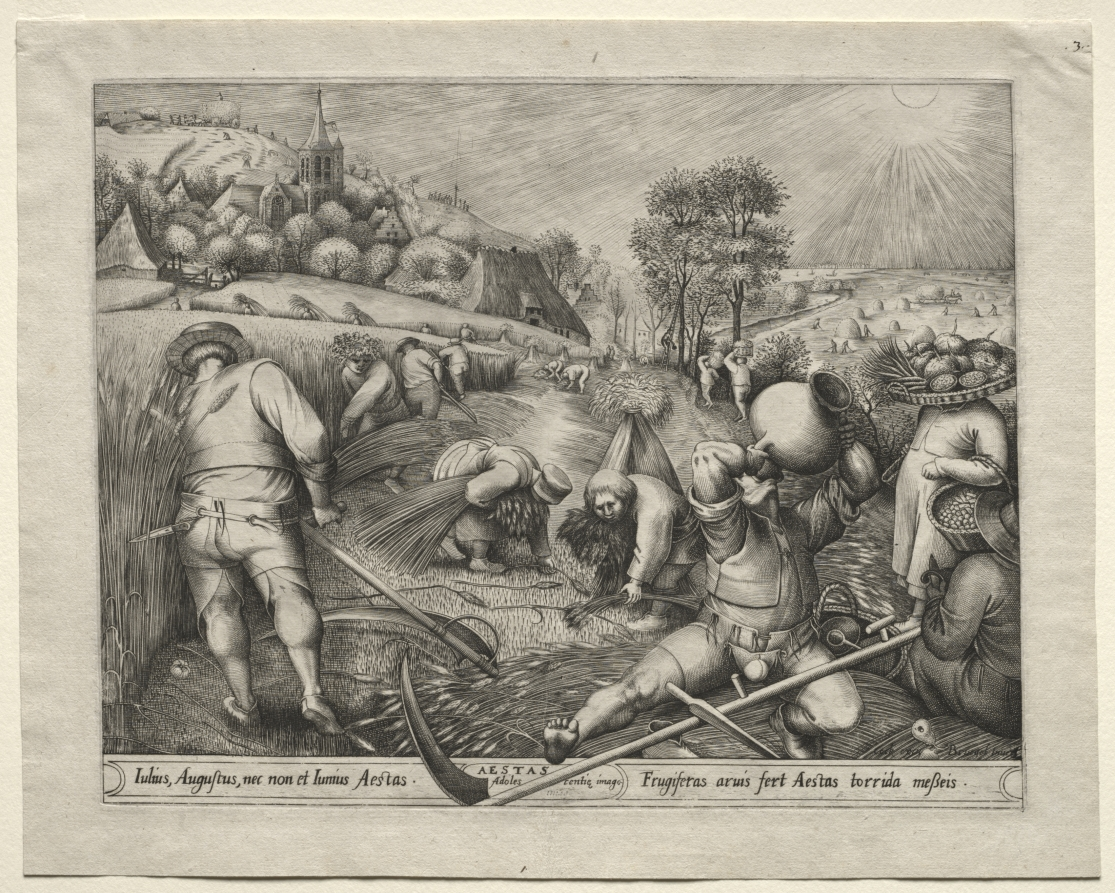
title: The Four Seasons: Summer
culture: Netherlands, 16th century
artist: Pieter van der Heyden (Netherlandish, c. 1530–after 1572)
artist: after Pieter Bruegel (Netherlandish, c. 1525/30–1569)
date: 1570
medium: engraving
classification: Print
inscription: translated Latin inscription: July, August, and also June make Summer. Summer, image of youth. Hot Summer brings bountiful harvests to the fields.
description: By the mid-16th century printmaking and printselling were big business in Europe. One of the most important firms, in Antwerp, was Hieronymus Cock's Aux quartre Vents (at the Sign of the Four Winds), so named because its goal was to disseminate prints to all four corners of the earth. Breugel collaborated with Cock by supplying drawings that were transformed into prints by professional engravers. In 1565 Bruegel executed a group of paintings of the months of the year based on the tradition of late medieval calendar illumination in which the labors of peasants mark the passage of the seasons. He then produced drawings of Spring and Summer to be engraved by the skillful Pieter van der Heyden. The set was completed with Autumn and Winter after drawings by Hans Bol.